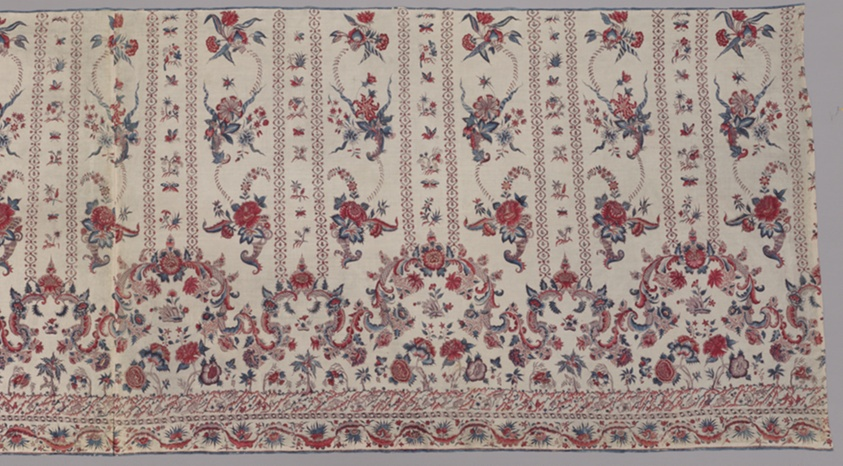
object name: Textile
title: Panel of Chintz for a Woman's Skirt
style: 18th Century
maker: Made in India possibly for the Dutch or Latin American market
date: 1730-50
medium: Cotton, plain weave; hand painted and dyed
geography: India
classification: textile; weaving - printed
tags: paisley, hunter, animals, floral, floral motifs, floral patterns, flowers, scrolls (motifs)